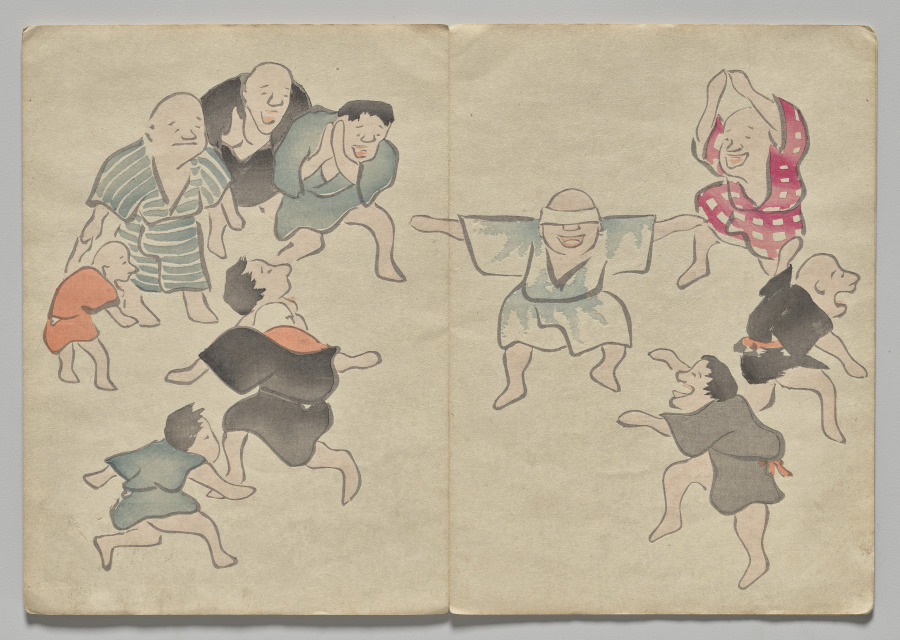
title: Scene from The Kōrin Picture Book (Volume 1)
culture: Japan, Edo period (1615–1868)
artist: Nakamura Hōchū (Japanese, d. 1819)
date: 1800s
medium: color woodblock printed book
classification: Bound Volume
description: Ogata Korin (1658-1716) was one of the most admired artists of Rimpa, or "decorative school painting." These books by the charming later-generation Rimpa artist Hochu record Korin's inventive designs.